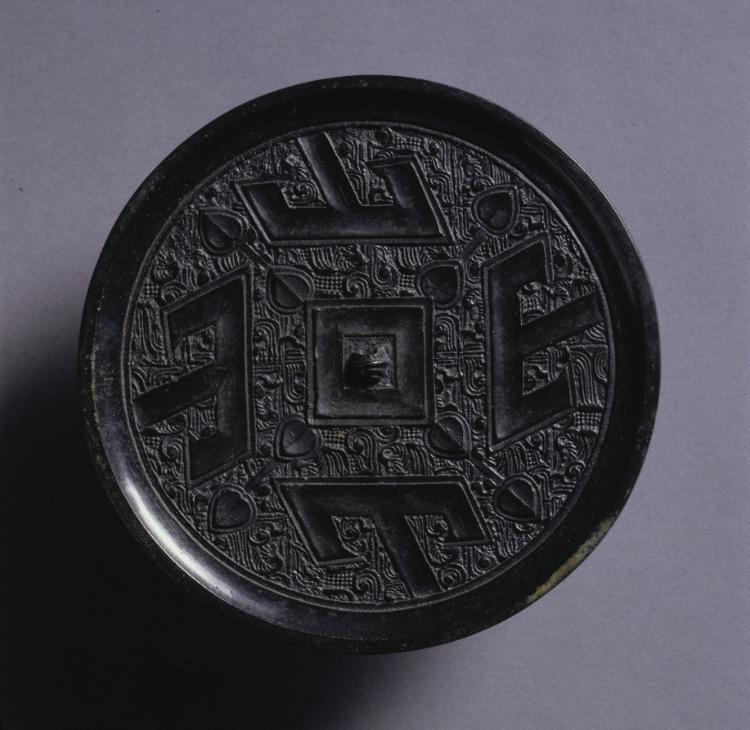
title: Mirror with Four T's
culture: China, Warring States period (475–221 BCE)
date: 300s BCE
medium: bronze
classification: Metalwork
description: The symbolic significance of the ancient Chinese mirror lies in its circular form and reflective quality that make it resemble the sun and the moon. "By the light of the sun, the world is made bright," so said a mirrorsmith. When the mirror was taken with its owner for use in the afterlife, it reflected the soul and brought eternal brightness to the next world.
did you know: The prominent T's on this mirror represent four gates in Chinese mythology that relate to transformation.